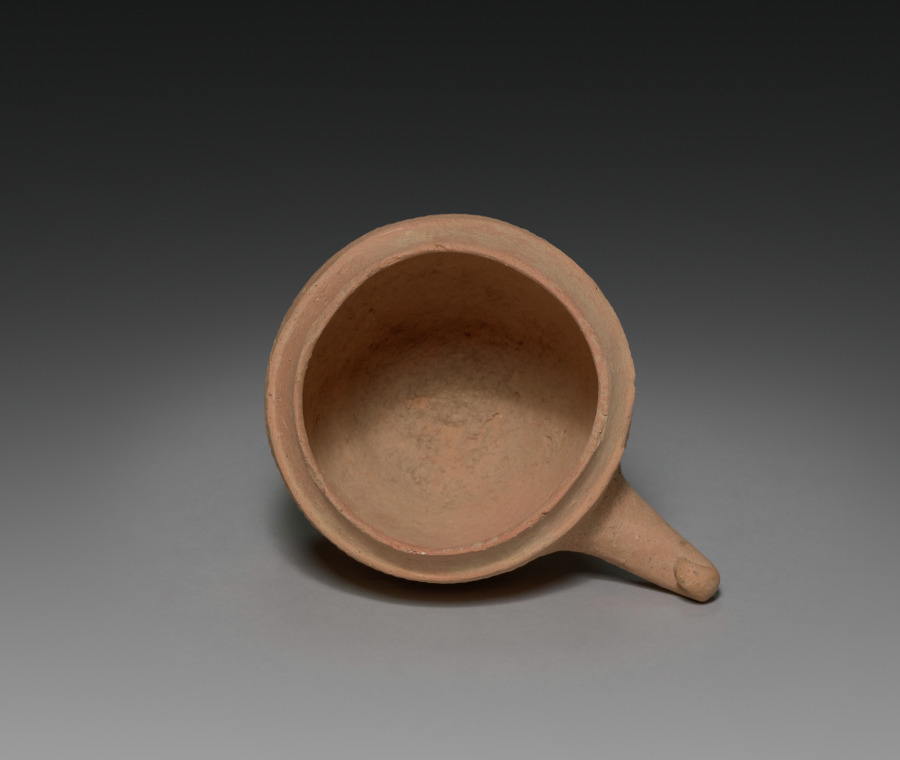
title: Covered Jar with Horn Handle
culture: Korea, Silla (57 BC-935) or Kaya (AD 42-562) period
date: 400s–500s CE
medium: red earthenware with impressed designs and applied red slip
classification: Ceramic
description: Early earthenware from the Three Kingdoms period (57 BCE–668 CE) became widely utilized as agriculture and religion grew to be essential elements in sustaining society and its systems. The clay jars of different sizes and shapes on display were made for the following purposes: some were used to store harvested grains and seeds, some, especially lidded ones such as this example, to preserve cremated remains, and some to serve offerings in rituals.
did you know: Closed kilns built on hillsides became widely used for producing this type of pottery vessel in Korea during the Three Kingdoms period.